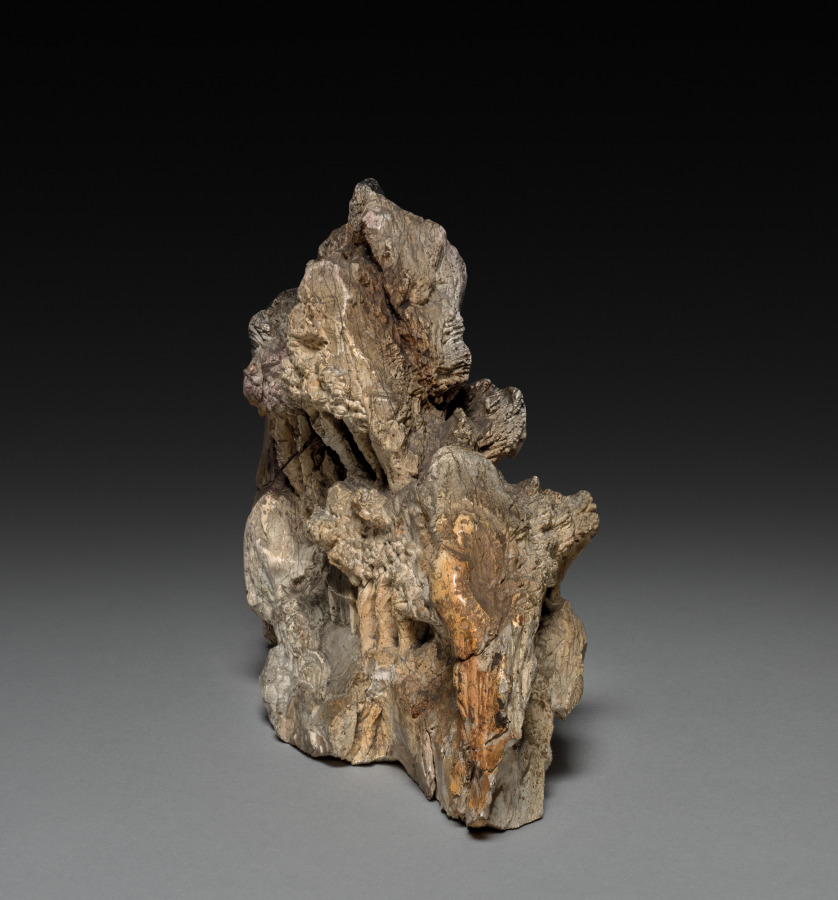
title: Mountain and Landscape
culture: China, Qing dynasty (1644-1911)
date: 1800s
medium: carved stone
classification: Jade